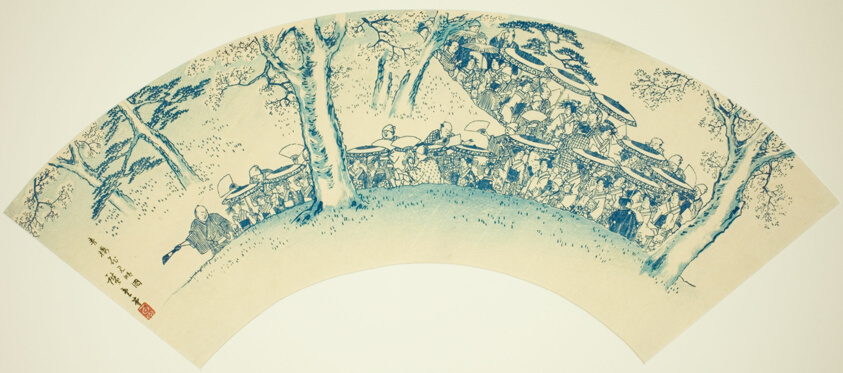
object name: Print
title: Flower-viewing Party from the Pleasure Quarters (Seiro hanami ryaku zu)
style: Japanese (culture or style)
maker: Utagawa Hiroshige 歌川 広重; Japanese, 1797-1858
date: mid–1830s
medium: Color woodblock print; ogi-e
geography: Japan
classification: woodblock print; print; asian art